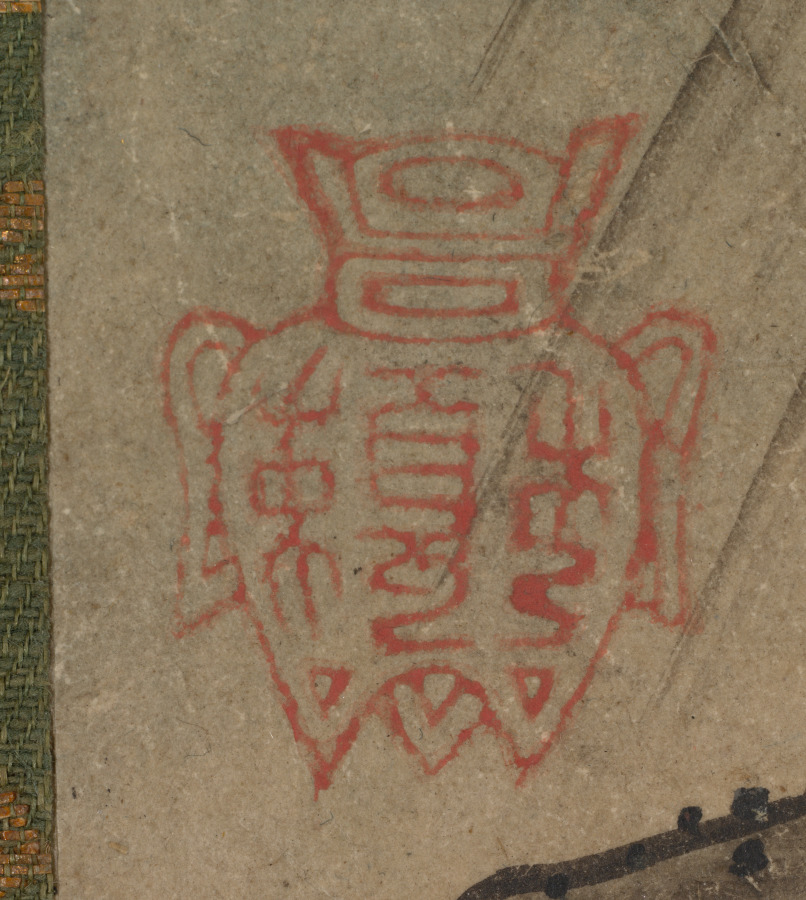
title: Chinese Literatus Viewing a Valley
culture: Japan, Muromachi period (1392–1573) to Edo period (1615–1858)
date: possibly mid- to late 1500s–1600s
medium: hanging scroll; ink and light color on paper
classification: Painting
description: This painting depicts a well-recognized scene in East Asian painting most often associated with the Chinese Southern Song dynasty painter Ma Yuan: a figure, most likely a retired government official, contemplating a high mountain valley from a scenic overlook. The lower left corner of the painting has a tripod-shaped seal resembling that of Kano Hideyori. The work appears to have either been made or repurposed to hang as a pair with a painting by Hideyori.